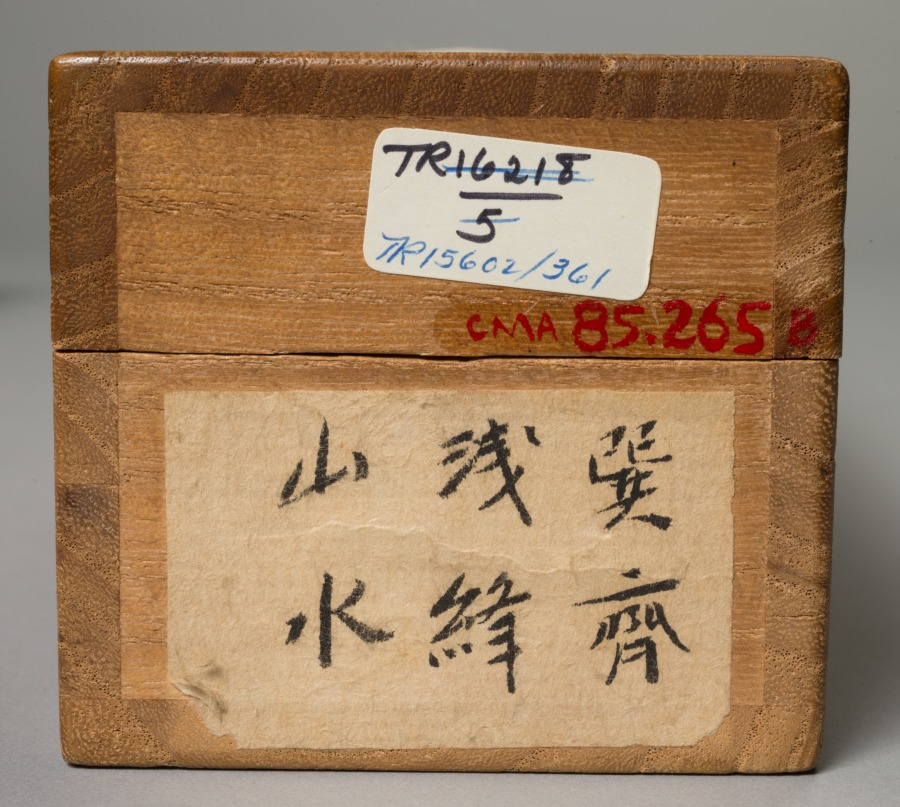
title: Landscape with Boaters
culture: Japan, Edo period (1615–1868)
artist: Kimura Kenkadō (Japanese, 1736–1802)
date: late 1700s–early 1800s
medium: hanging scroll; ink and slight color on paper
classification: Painting